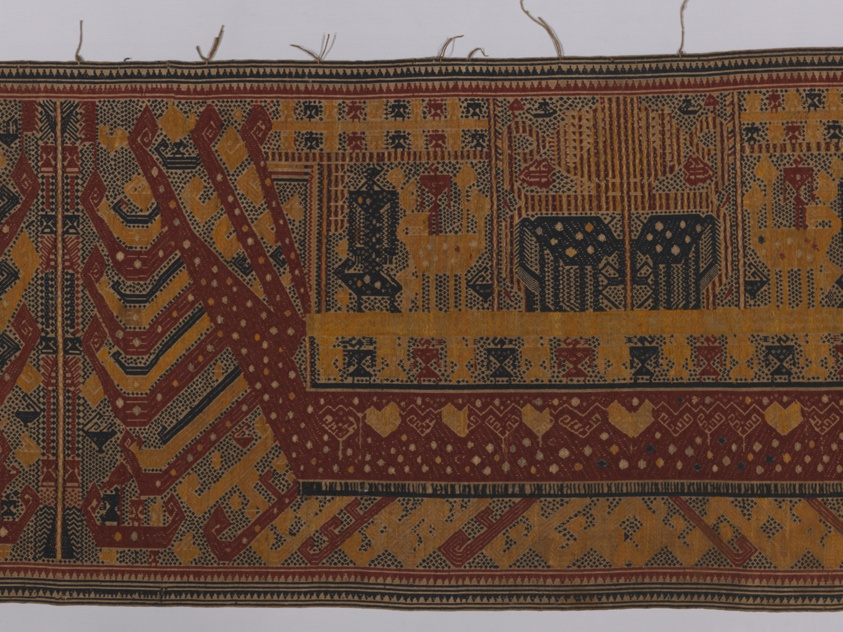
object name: Religious/Ritual Object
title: Ceremonial Hanging (palepai)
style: indonesian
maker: Paminggir people; Indonesia, South Sumatra, Lampung area, Kalianda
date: 19th century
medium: Cotton, silk, and silver-leaf-over-lacquered-paper-strip-wrapped bast fiber (probably ramie), plain weave with supplementary patterning and brocading wefts, main warp fringe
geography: Indonesia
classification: textile; weaving; ritual objects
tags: boats, figures (representations), seas, waves